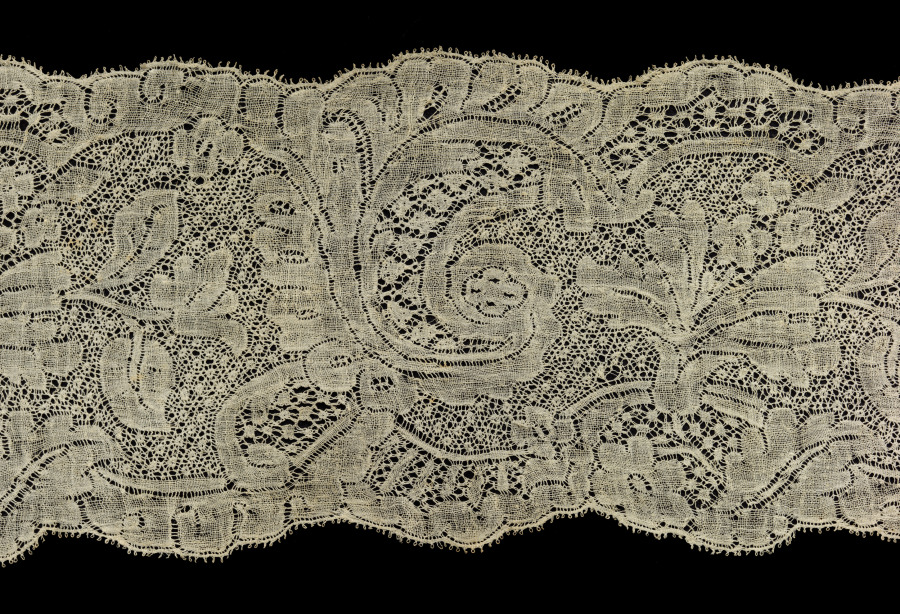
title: Lace Lappets and Edging for Cap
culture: Belgium, Binche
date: 1700s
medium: Linen: bobbin lace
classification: Lace